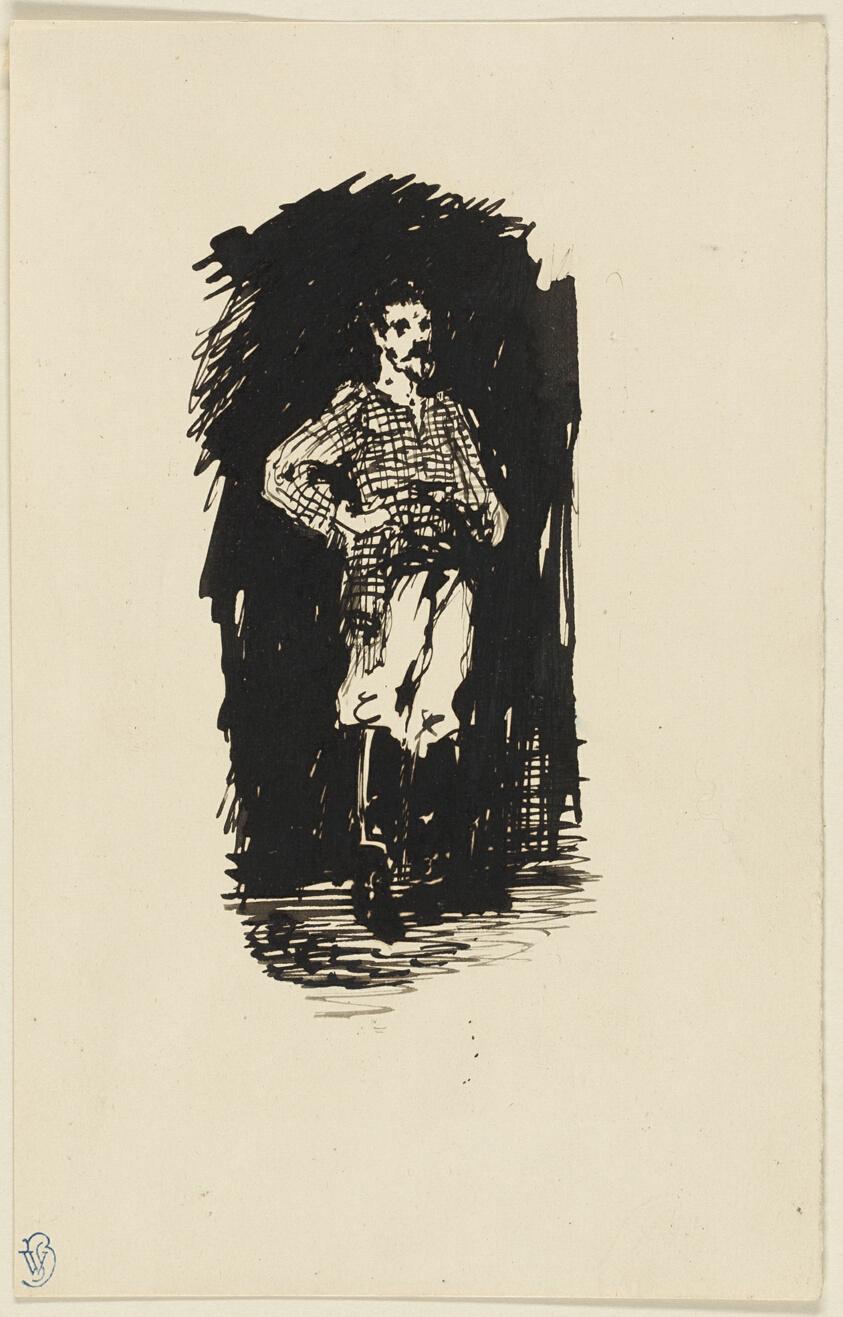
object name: Drawing and Watercolor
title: Man in Plaid Shirt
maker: James McNeill Whistler (American, 1834-1903); Thomas William Waller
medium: Pen and black ink, on cream laid paper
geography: United States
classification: pen and ink drawings; drawings (visual works); prints and drawing; paper